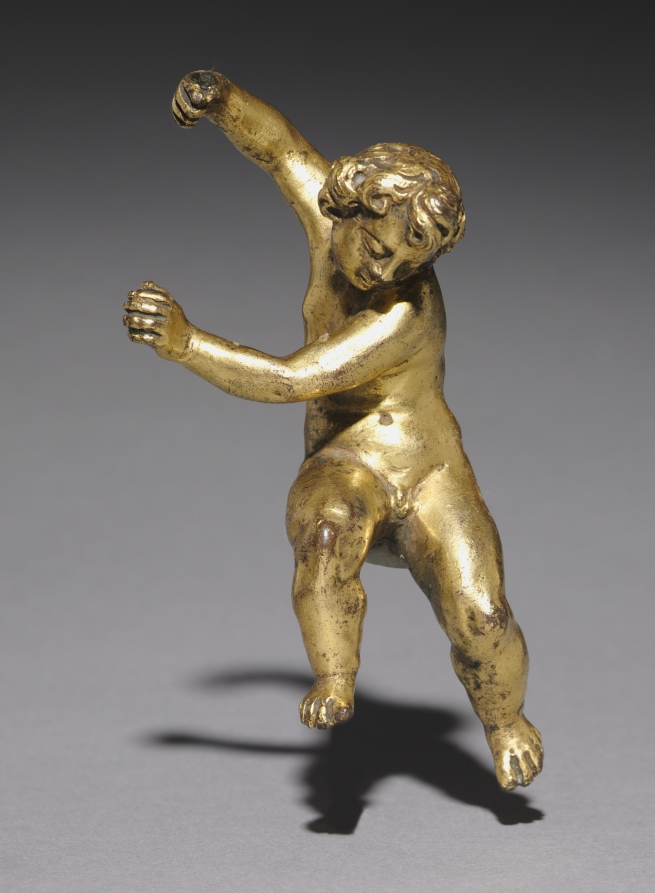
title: Putto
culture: Italy, Rome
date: late 1500s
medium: gilt bronze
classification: Sculpture